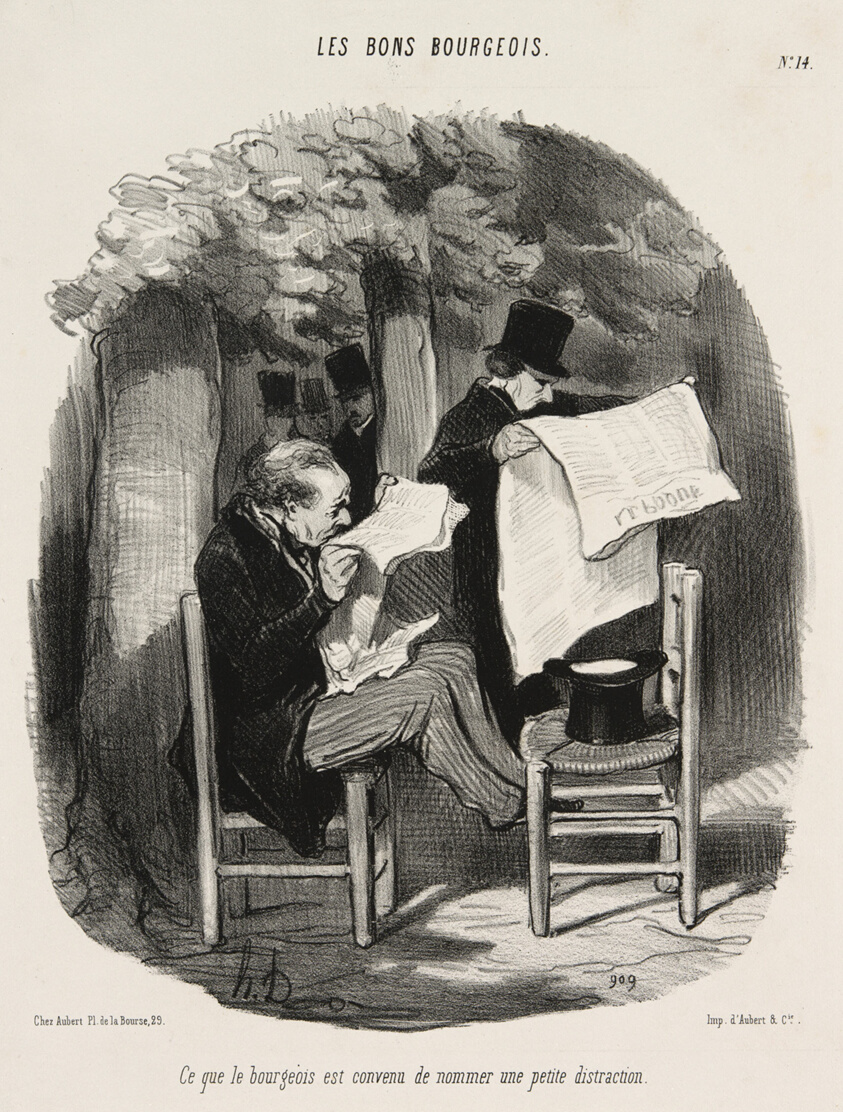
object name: Print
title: This is What a Bourgeois Considers a Small Distraction, plate 14 from Les Bons Bourgeois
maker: Honoré Victorin Daumier; French, 1808-1879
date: 1846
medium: Lithograph in black on white wove paper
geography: France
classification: lithograph; print; prints and drawing